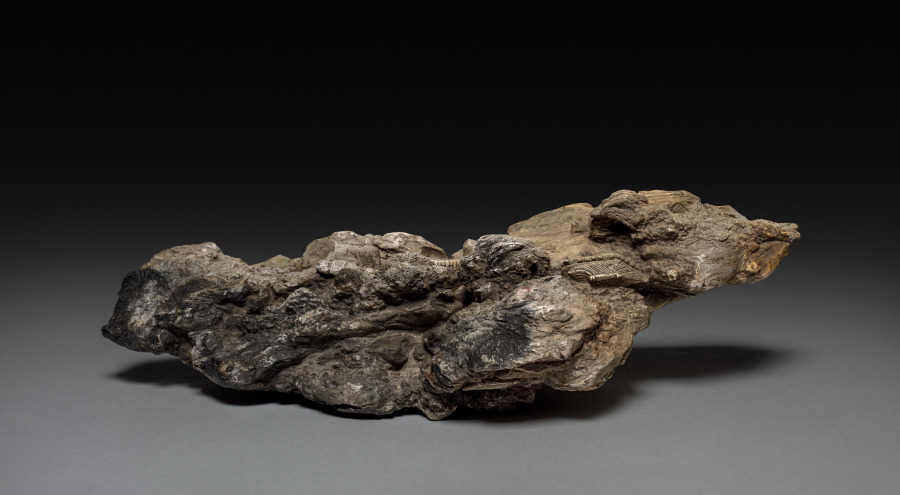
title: Mountain and Landscape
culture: China, Qing dynasty (1644-1911)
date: 1800s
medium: carved stone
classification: Jade